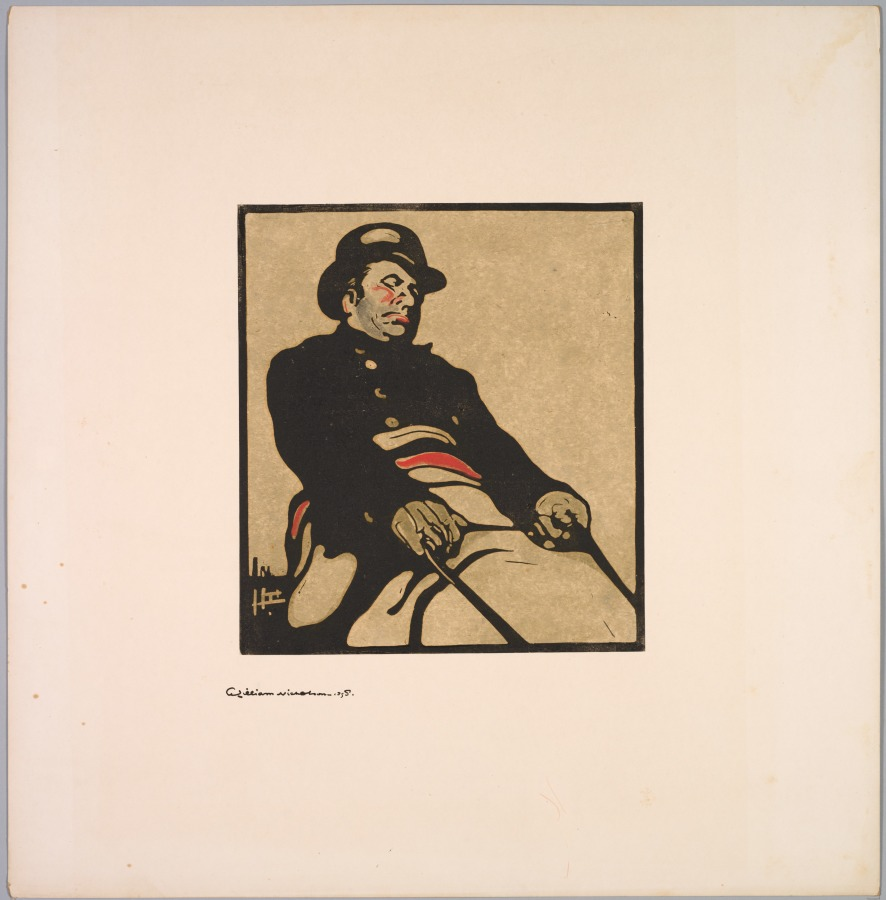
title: London Types: Bus Driver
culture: England, 19th century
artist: William Nicholson (British, 1872–1949)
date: 1898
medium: woodcut hand-colored with watercolor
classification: Print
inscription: lower left margin, in black ink: William Nicholson 1898.